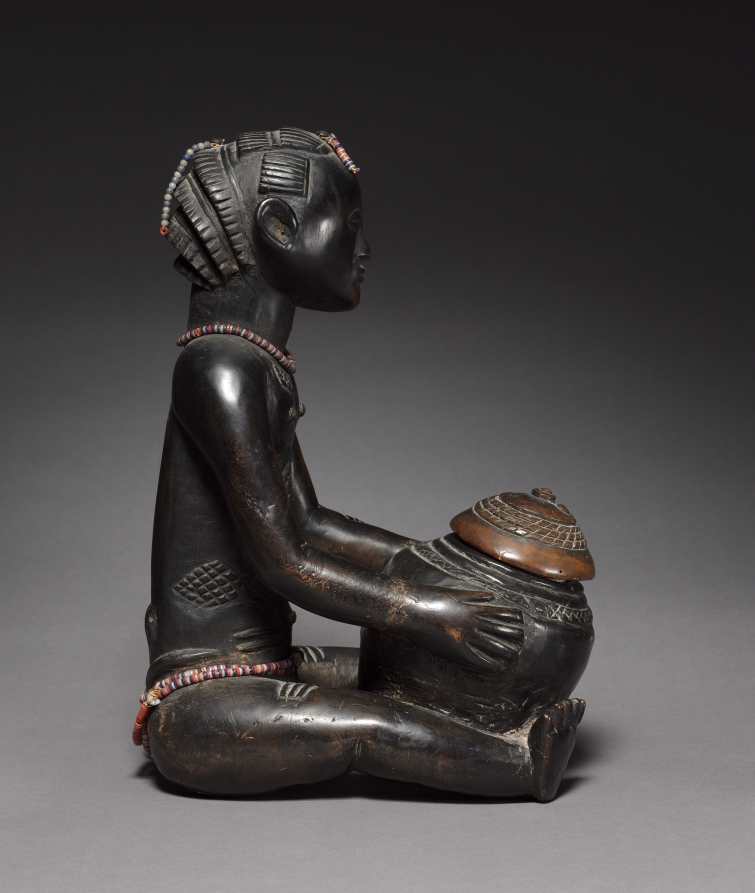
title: Female Bowl-Bearing Figure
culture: Africa, Central Africa, Democratic Republic of Congo, Luba-style carver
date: late 1800s-early 1900s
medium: Wood, glass beads, upholstery studs, plant fiber, and iron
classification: Sculpture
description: In Luba-style art, an object's beauty affects how well it works. While bowl-bearing figures had many possible uses, a royal diviner likely used this well-carved image of a woman carrying a bowl in rituals. Dusty traces of mpemba (white chalk) fleck the shining exterior and the bowl's interior, showing it once held this sacred powder. Diamond-shaped scarification marks at her waist, chest, and back add to her beauty. Her hair is carved into the cascading layered hairstyle worn in the Luba region at the turn of the twentieth century. Strands of imported glass beads encircle her waist and neck, and dangle from her hair. The alternating white and blue beads may symbolize the moon and Mbidi Kiluwe, a culture hero linked to royal practice and smithing. While much Luba-style art depicts women—who are societally important—men created and owned the majority of such works.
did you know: Symbolic of anvils, the round metal tacks decorating the figure's hair "pin" spirits and their secrets within it. They are at the hairline and each of the four hair cascades (the bottommost is now gone).